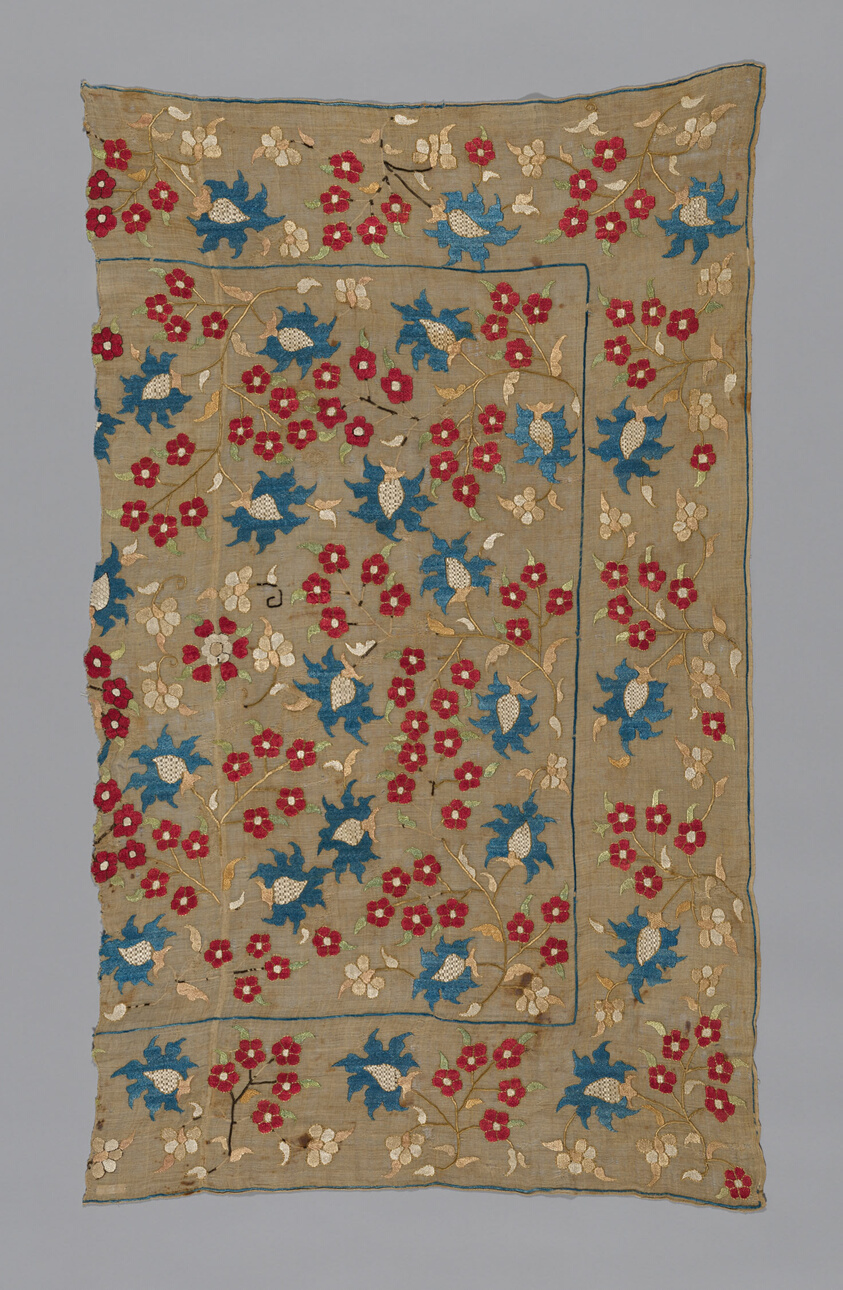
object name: Textile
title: Fragment (Cover or Turban Cover)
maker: Turkey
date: 17th century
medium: Linen, plain weave; embroidered with silk in darning, double running, twined double running, and stem stitches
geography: Turkey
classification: textile; weaving; needlework (visual works)